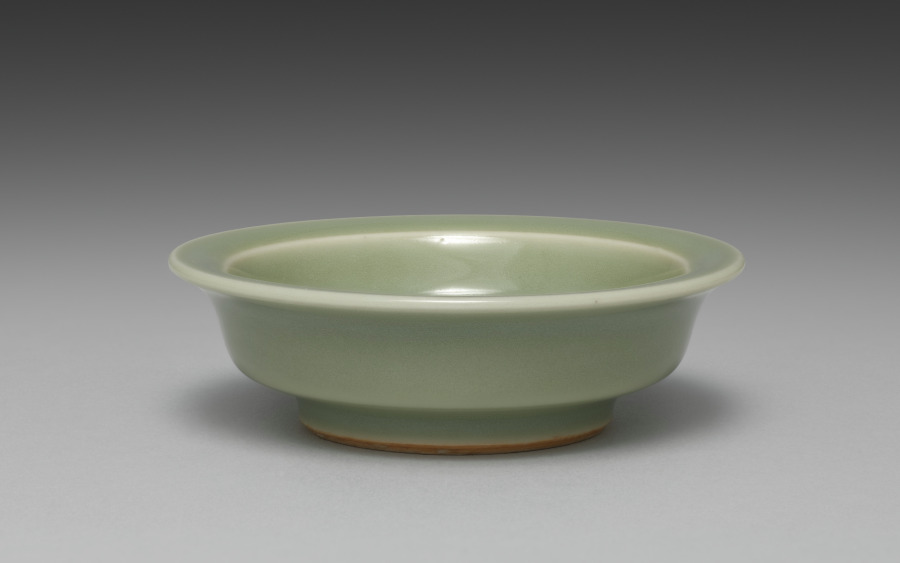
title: Saucer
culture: Japan, Meiji period (1868–1912)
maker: Seifū Yohei III (Japanese, 1851–1914)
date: 1893–1914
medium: One from a set of ten dishes; porcelain with green glaze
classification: Ceramic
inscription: 清風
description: Yohei III’s main output for his sophisticated clientele was in the form of tea sets and dining sets. He created a range of dishes in green glazes. He often produced in pairs, sets of five, or sets of ten. For this set of ten small dishes in a simple, round form that emphasizes the glaze above all, the box lid designates the piece as seiji, or green-glazed porcelain, using a general term for the extensive palette of green glazes often called celadon in English. The box lid further identifies the dishes themselves as tōchō, literally “bean-sized saucers,” a size that makes them suitable for dipping sauces.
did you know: The ten dishes in this set are stored in stacks of five in a two-compartment box.